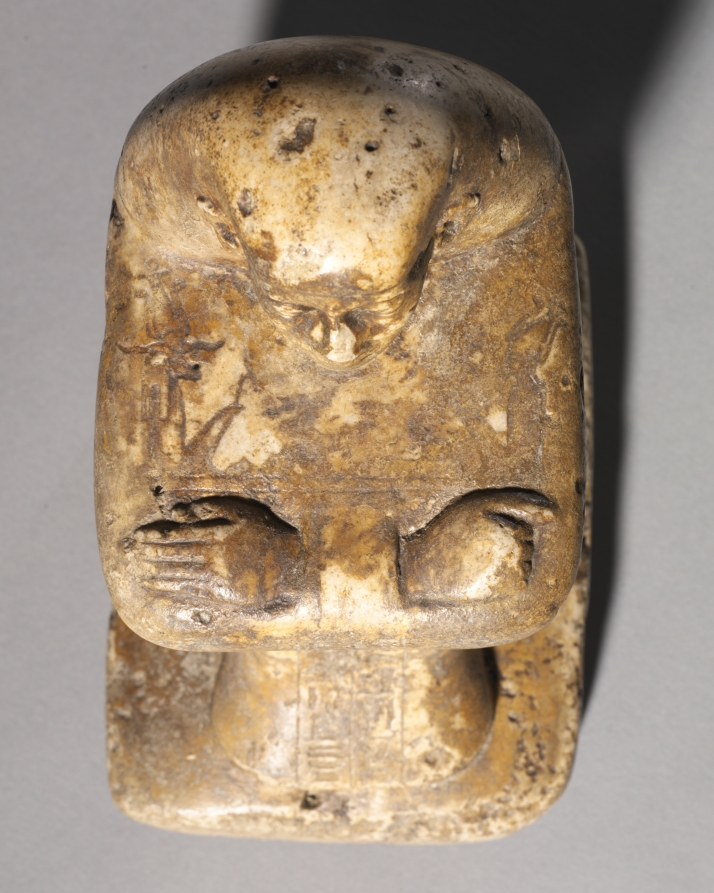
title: Block Statue of Djedbastetiufankh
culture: Egypt, Late period (715–332 BCE), Dynasties 25–26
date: c. 664–610 BCE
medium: limestone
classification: Sculpture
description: There are two basic types of Egyptian statues: tomb statues and temple statues. The Bust of Ankh-Hor and the Block Statue of Djedbastetiufankh in this case are temple statues. The compact form of the block statue appealed to Egyptian sculptors because it was virtually unbreakable. It represents the subject squatting on the ground, arms crossed over his knees. His long, enveloping mantle is contoured to his body shape, so that it resembles a cube. From the position of the arms, it is evident that the Bust of Ankh-Hor originally belonged to a striding figure holding a naos, or shrine, containing the image of a deity. His high.waisted wraparound robe, fashionable during the Persian Period (Dynasty 27) when this figure was carved, would have reached to his ankles.